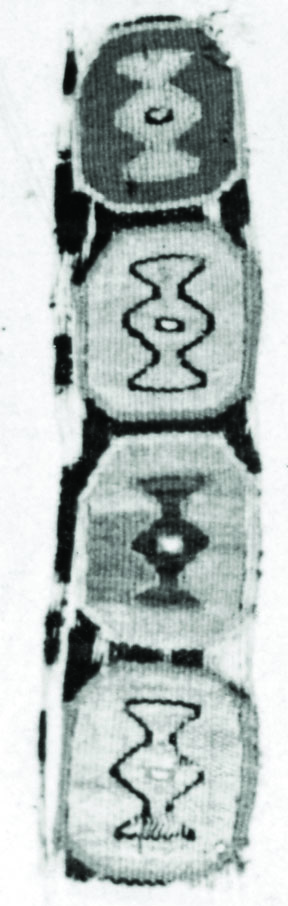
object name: Textile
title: Fragment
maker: Possibly central coast, Peru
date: A.D. 1000/1476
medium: Slit tapestry (old card)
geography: Peru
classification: textile; weaving